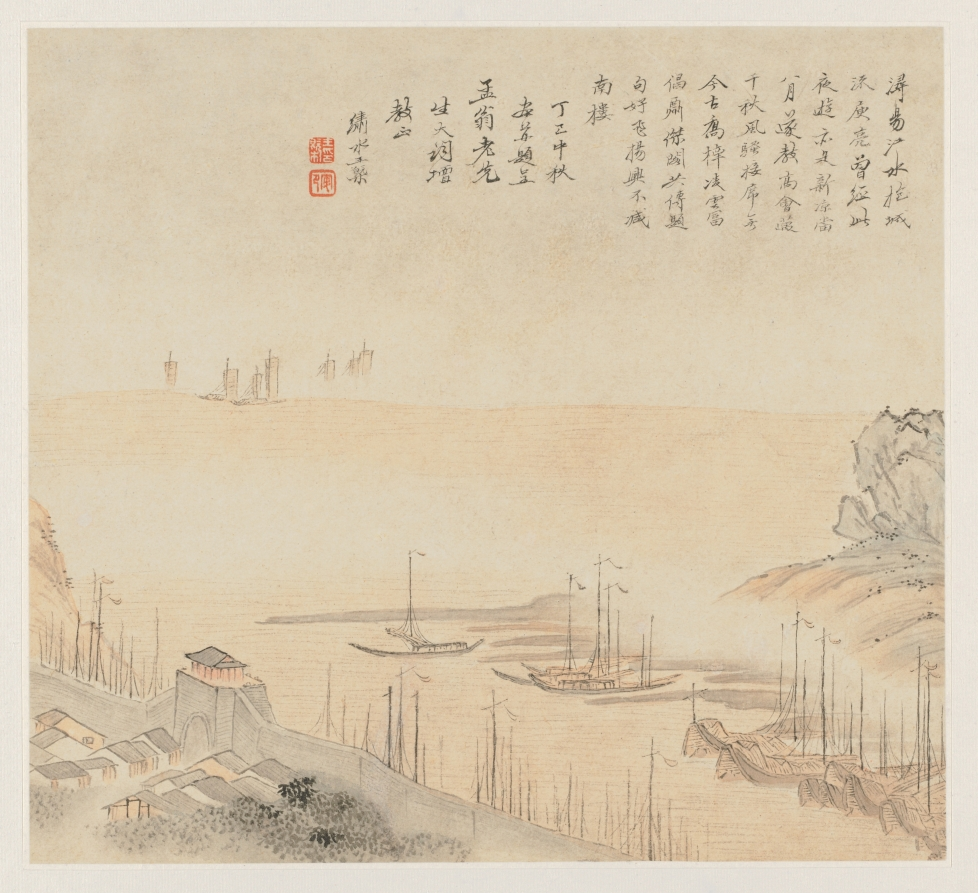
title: Album of Landscapes: Leaf 8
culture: China, Qing dynasty (1644-1911)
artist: Wang Gai (Chinese, active c. 1677–1705)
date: 1677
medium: album leaf, ink and light color on paper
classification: Painting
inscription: Artist's poem, signature, and 2 seals on leaf 8 Poem by Wang Wan